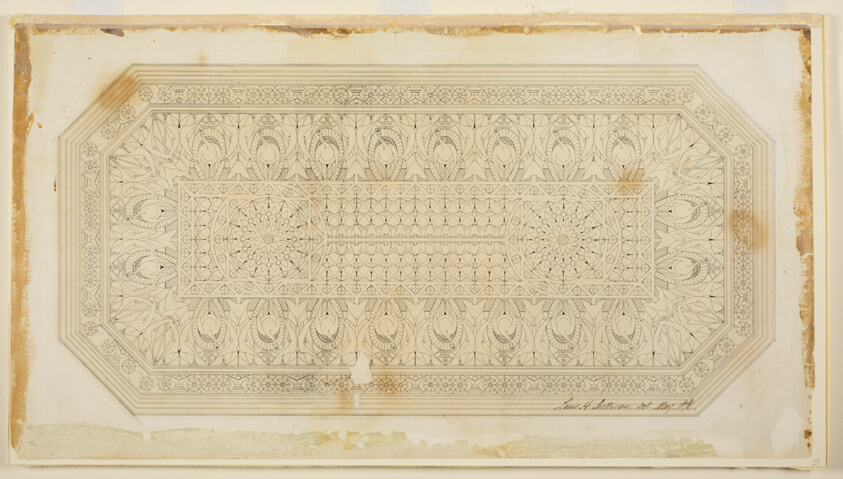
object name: Architectural Drawing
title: Ceiling Design with Peacock Motif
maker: Louis H. Sullivan (American, 1856-1924)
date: 1876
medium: Ink on paper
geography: United States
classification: architectural drawing; architecture